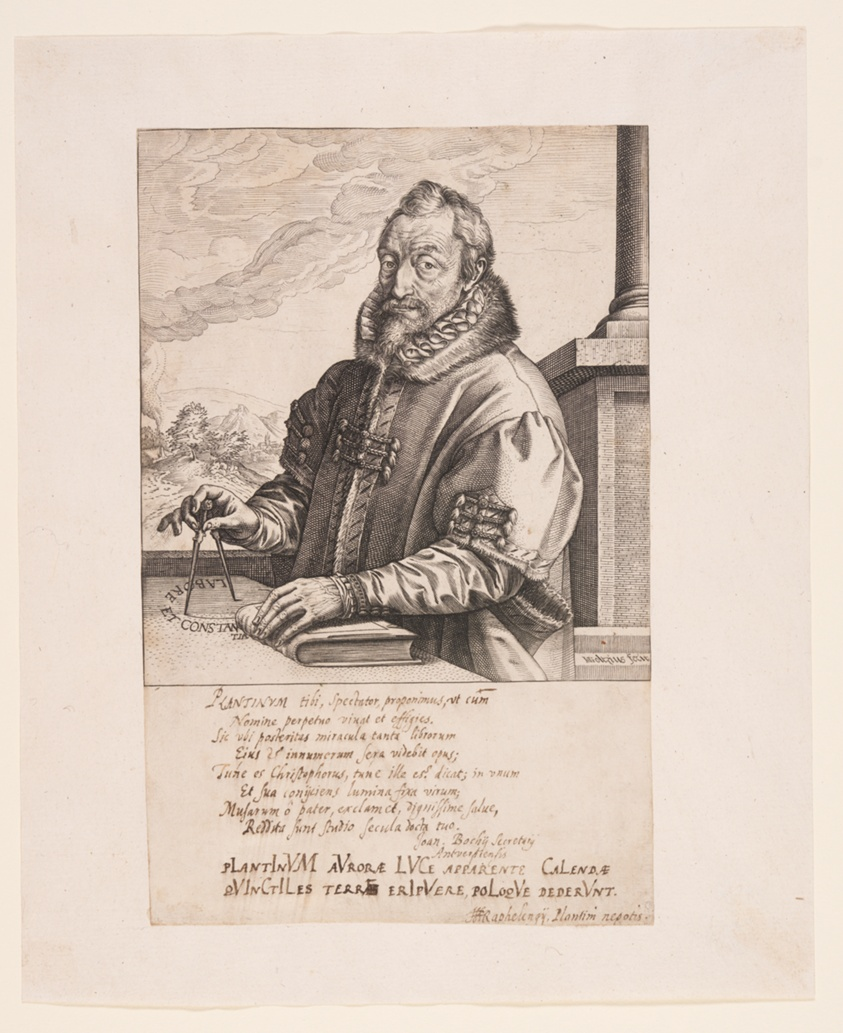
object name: Print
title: Christopher Plantin, Publisher in Antwerp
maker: Hendrick Goltzius (Dutch, 1558–1617)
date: c. 1589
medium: Engraving on laid paper, with additions in pen and ink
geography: Netherlands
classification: engraving; paper; print; prints and drawing